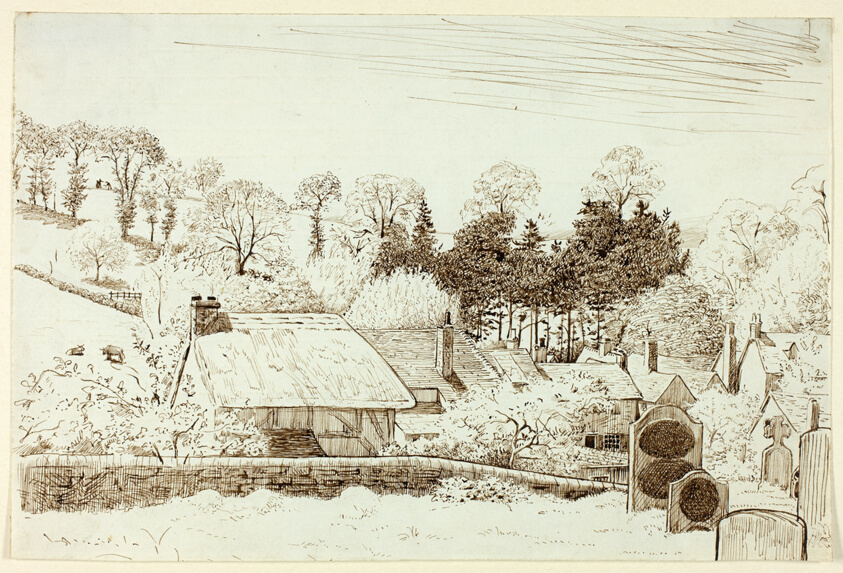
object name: Drawing and Watercolor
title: Churchyard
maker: Henry Stacy Marks (English, 1829-1898)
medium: Pen and brown ink on blue wove paper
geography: England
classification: pen and ink drawings; drawings (visual works); prints and drawing